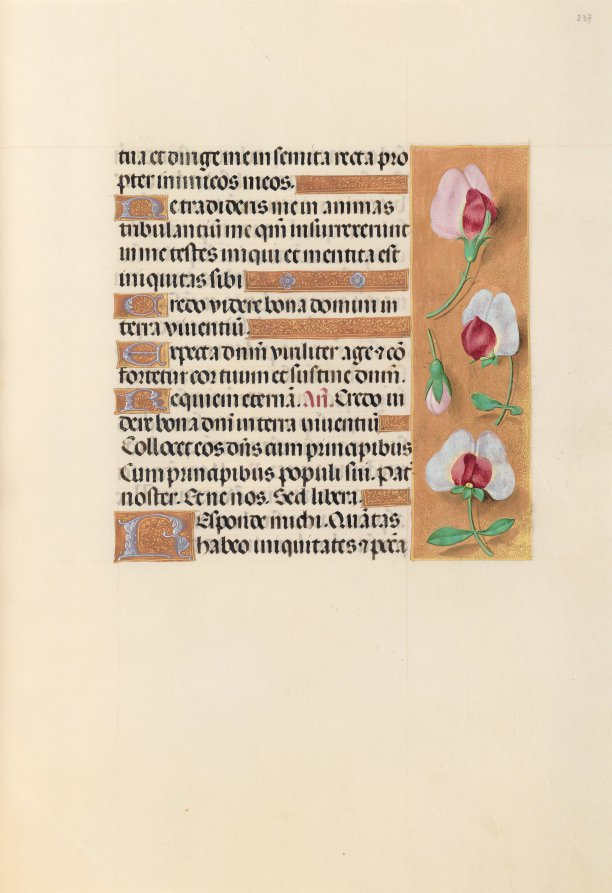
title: Hours of Queen Isabella the Catholic, Queen of Spain: Fol. 237r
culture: Flanders, Ghent and Bruges, late 15th century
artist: Master of the First Prayerbook of Maximillian (Flemish, c. 1444–1519)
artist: and Associates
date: c. 1500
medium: ink, tempera, and gold on vellum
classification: Bound Volume